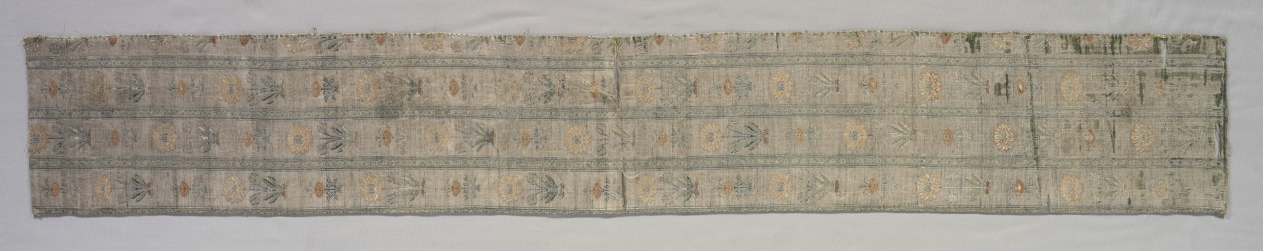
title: Surround for Turkish Silk Cushion Cover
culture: Iran, Safavid period (1501–1722)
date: early 1600s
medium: silk, silver-metal thread: plain weave with inner warps and with continuous and discontinuous supplementary wefts bound in plain and 1/3 Z twill order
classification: Textile